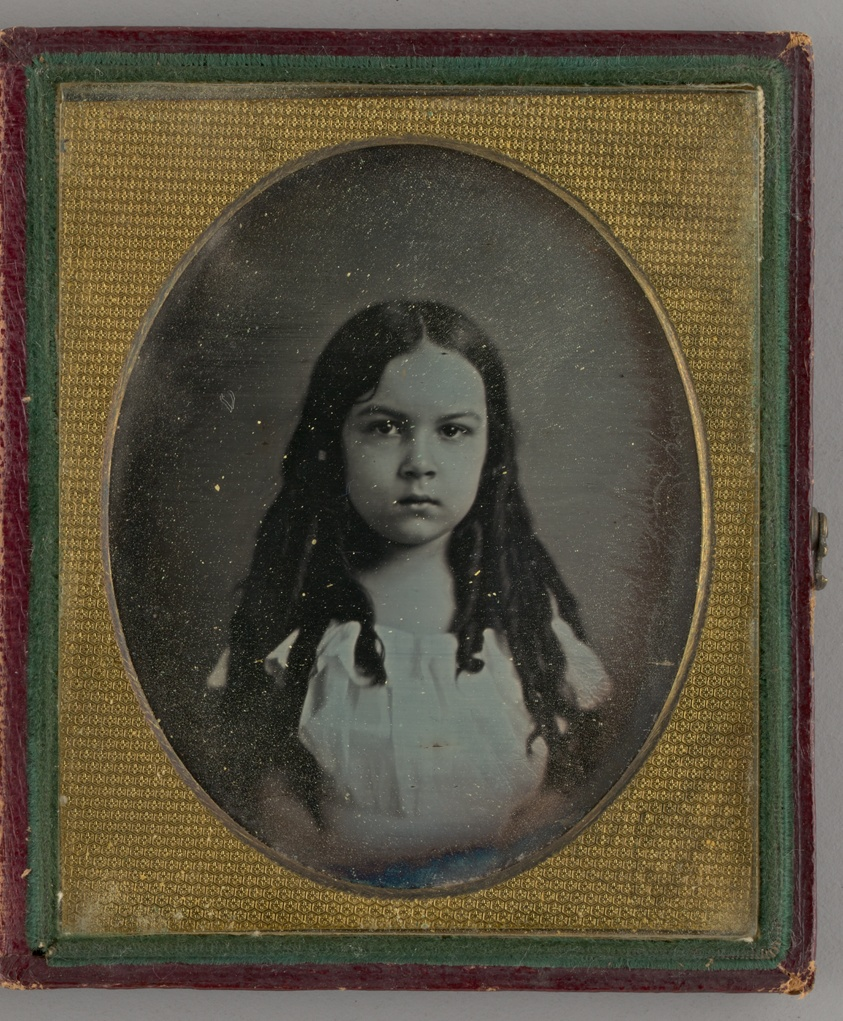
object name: Photograph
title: Untitled (Portrait of a Girl)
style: 19th century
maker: Robert Cornelius (American, 1809-1893)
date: 1841/42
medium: Daguerreotype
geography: United States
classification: portrait; photograph; photographic process; photography; portrait; daguerreotype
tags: lundberg collection, portraits, portraits: child subject, portraits: female subject, female